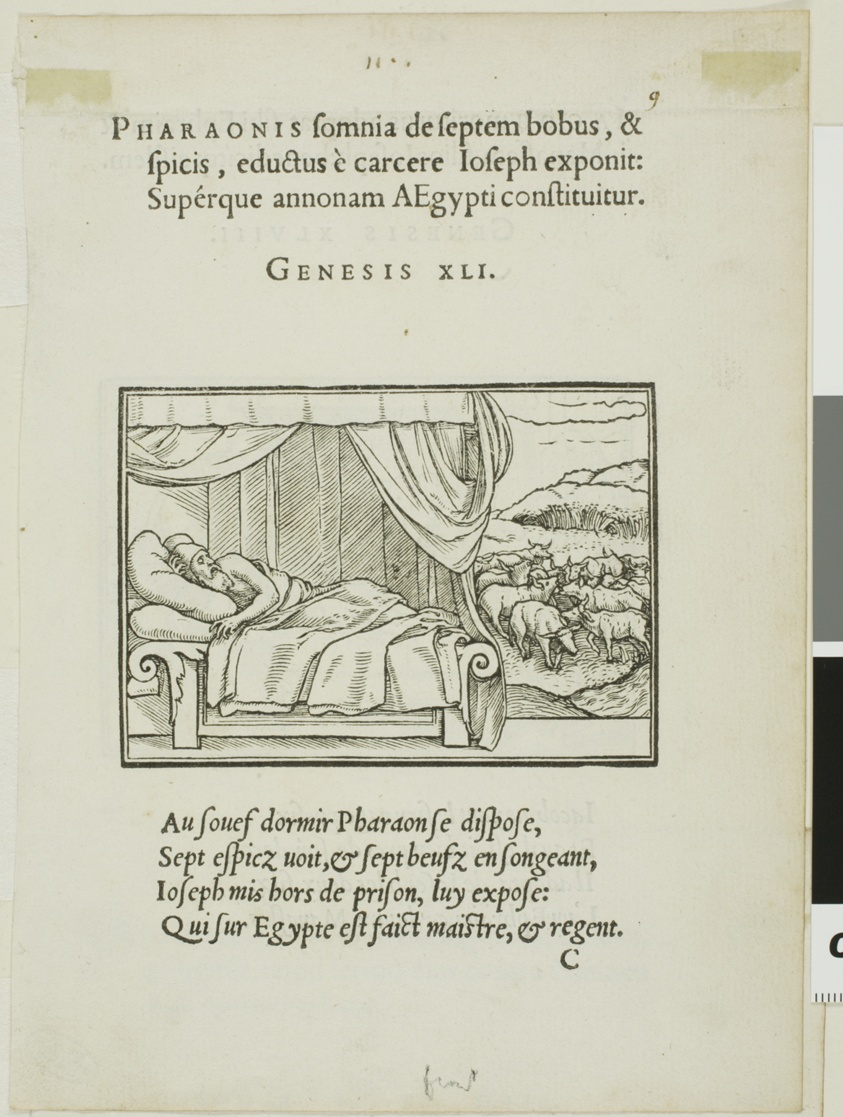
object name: Print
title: Pharoah's Dream (recto); Jacob Adopts Sons of Joseph (verso)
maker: Hans Holbein, the younger (German, 1497-1543)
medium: Woodcut on paper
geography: Germany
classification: woodcut; print; prints and drawing